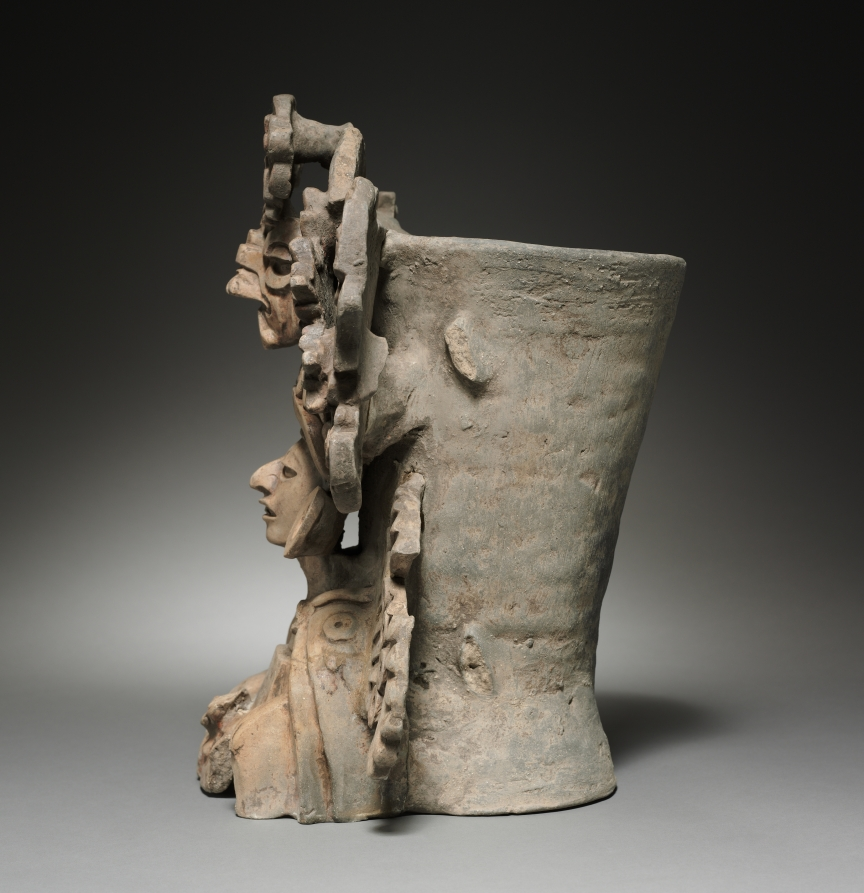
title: Funerary Urn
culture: Mexico, Oaxaca, Zapotec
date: 350–500 CE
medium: terracotta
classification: Sculpture